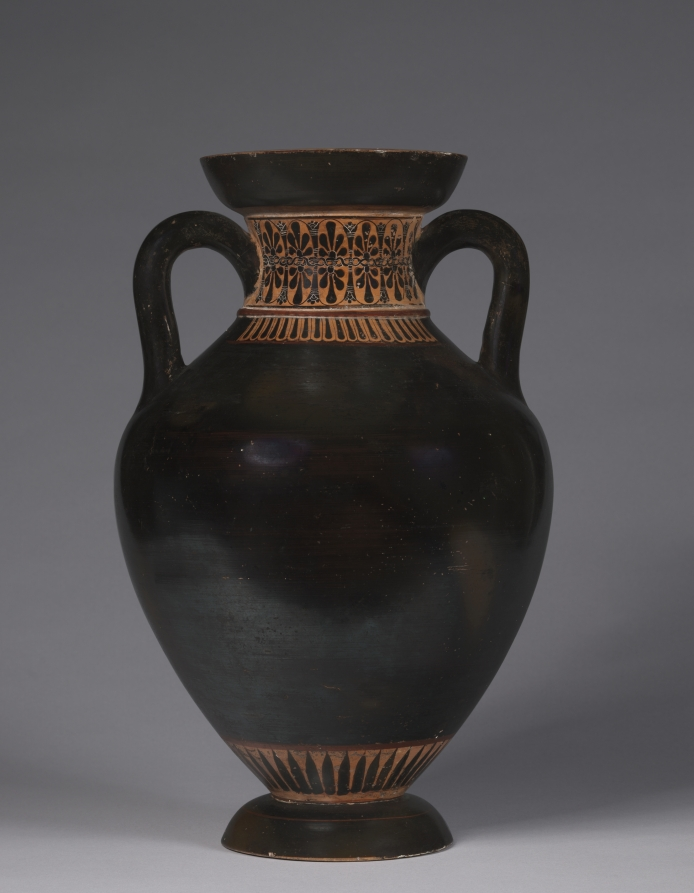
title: Black-Figure Neck-Amphora of Panathenaic Shape (Storage Vessel)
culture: Greek, Attic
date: 525–500 BCE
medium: ceramic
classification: Ceramic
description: The narrow neck and base of amphorae of this shape probably derive from vessels used to transport oil and wine long distances. Here, the painted decoration accentuates the shape, with simple rays at the base, tongues on the shoulder, and a double lotus-and-palmette chain on the neck. Added red rings separate these patterns, with black gloss covering most of the exterior; only the upper surface of the mouth is reserved. Similarly shaped vases decorated with Athena on the front and athletic or equestrian scenes on the back were filled with Athenian olive oil and awarded as prizes to victors in the Panathenaic games.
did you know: The shape of this amphora mimics those of larger, figured prize vases.